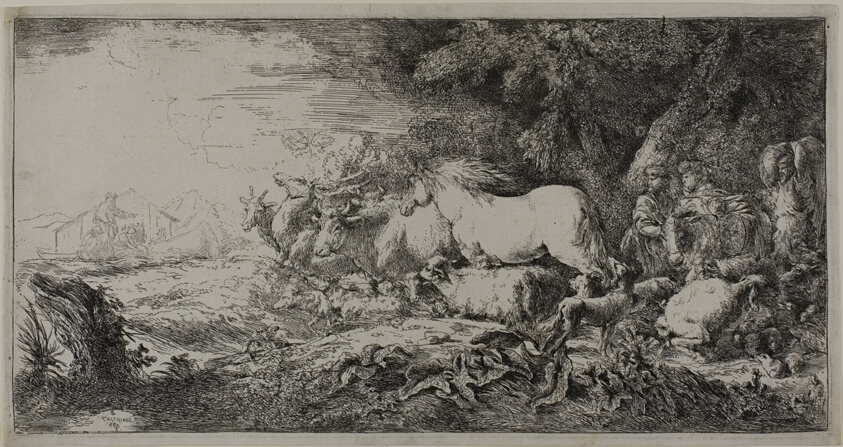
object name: Print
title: Noah and the Animals Entering the Ark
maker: Giovanni Benedetto Castiglione (Italian, 1609-1664)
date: 1650/55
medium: Etching on ivory paper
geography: Italy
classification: etching; print; prints and drawing